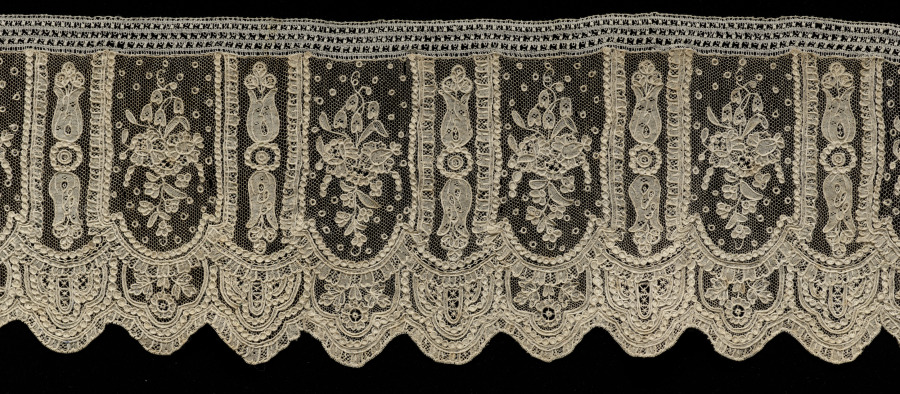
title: Lace Edging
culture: France, Alençon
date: 1800s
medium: Linen: needle lace (Point d'Alençon)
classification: Lace